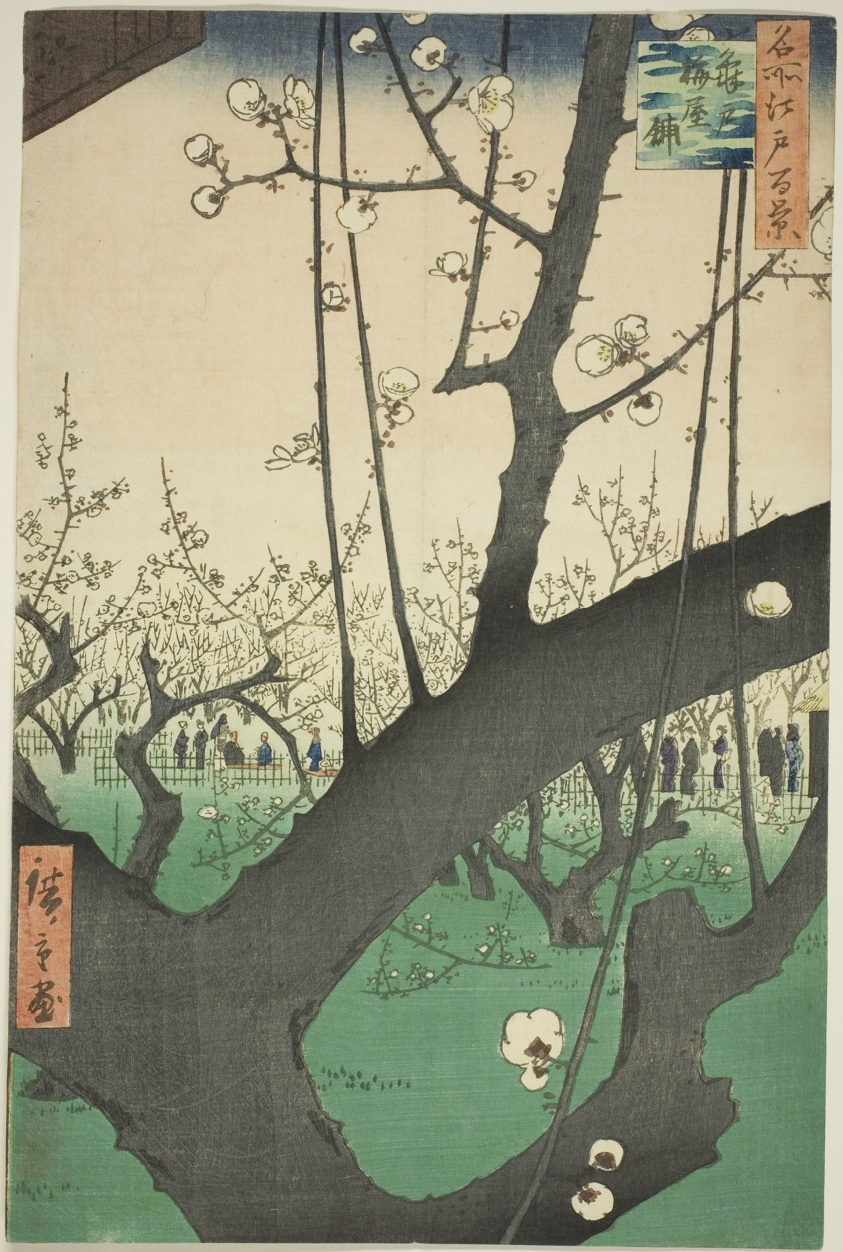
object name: Print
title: Plum Garden at Kameido (Kameido Umeyashiki), from the series "One Hundred Famous Views of Edo (Meisho Edo hyakkei)"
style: Japanese (culture or style)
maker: Utagawa Hiroshige 歌川 広重; Japanese, 1797–1858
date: 1857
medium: Color woodblock print; oban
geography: Japan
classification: woodblock print; print; asian art